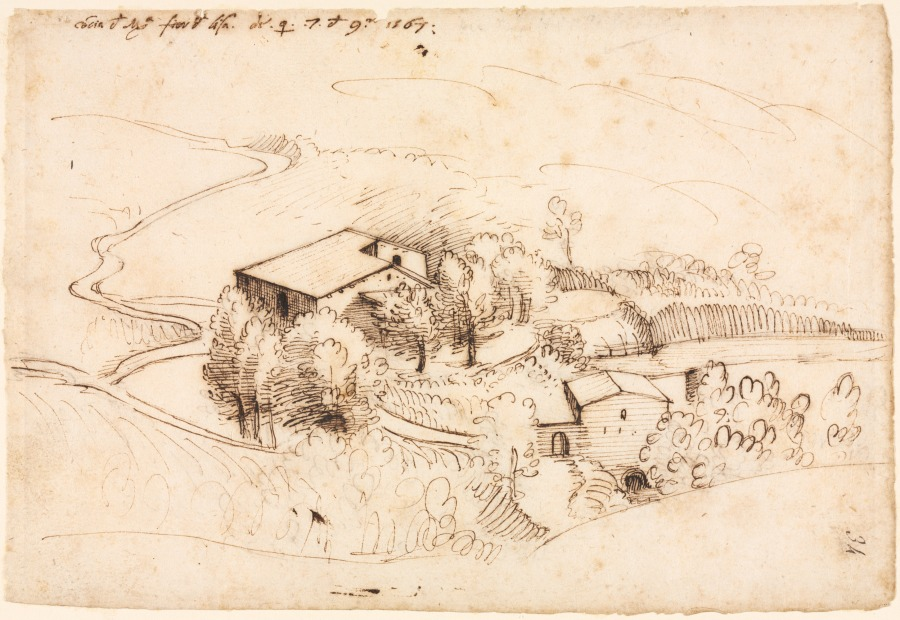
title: Farm with Trees in a Hilly Landscape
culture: Italy, 16th century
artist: Gherardo Cibo (Italian, 1512–1600)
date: 1567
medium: pen and brown ink (iron gall)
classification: Drawing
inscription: recto: by artist, upper left and upper center, in brown ink: co~cia d Mra fior d lisa. de. q. .7. d. 9re. 1567: ; lower right, in brown ink: 34 [sideways]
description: Gherardo Cibo was more botanist than professional artist. The compiler of least five volumes of dried plant specimens collected in the Marches (central-eastern) region of Italy, Cibo made drawings in order to record the habitats where he collected plants. He executed this drawing in the field, annotating, at upper left, the dried cornflower (concia fior da liso) he had gathered on the spot. Though Cibo learned to draw landscapes at an early age when he visited Northern Europe, this sheet reveals his knowledge of Florentine and Venetian models.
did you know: The identity of the artist of this and related sheets was not made until the late 20th century, before which he was known erroneously as "Messer. Ulisse Severino da Cingoli."